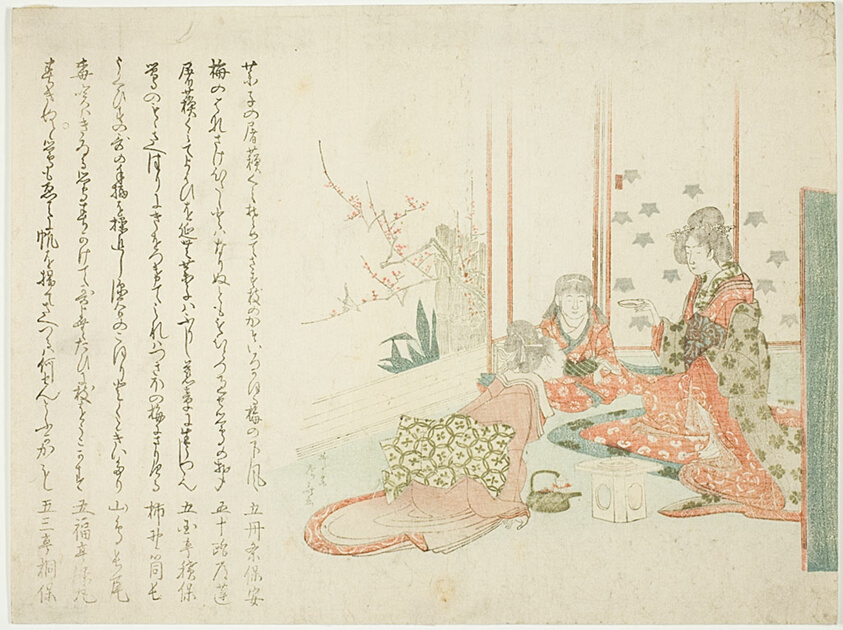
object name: Print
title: Ladies Drinking Tea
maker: Ryuryukyo Shinsai (Japanese, c. 1764-1820)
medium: Color woodblock print; surimono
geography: Japan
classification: woodblock print; print; asian art